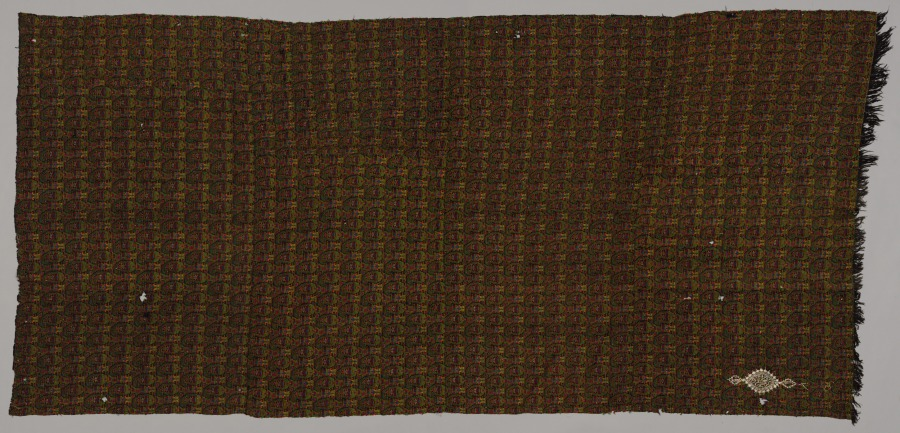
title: Shawl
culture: India, Punjab, late 19th century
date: late 1800s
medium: tapestry twill; wool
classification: Textile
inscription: Arabic inscription in left corner; may give name and/or date.